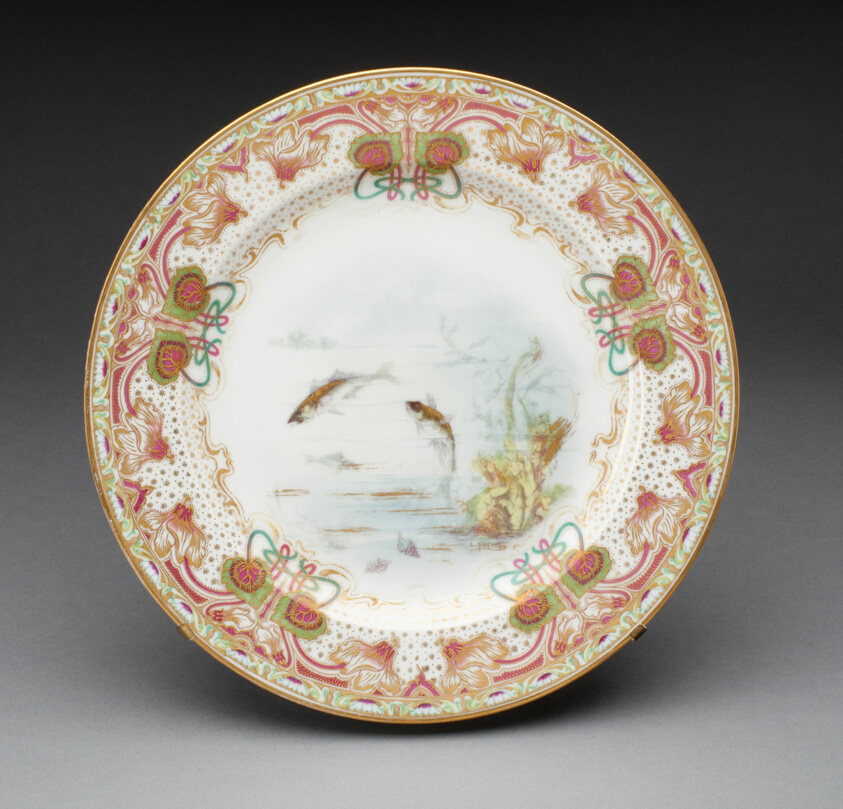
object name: Ceramics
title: Plate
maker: Théodore Haviland (French, early 20th century)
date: c. 1900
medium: Porcelain with polychrome enamels and gilding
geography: France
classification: plate (general, dish); dish (vessel); tableware; european decorative arts; porcelain; ceramics